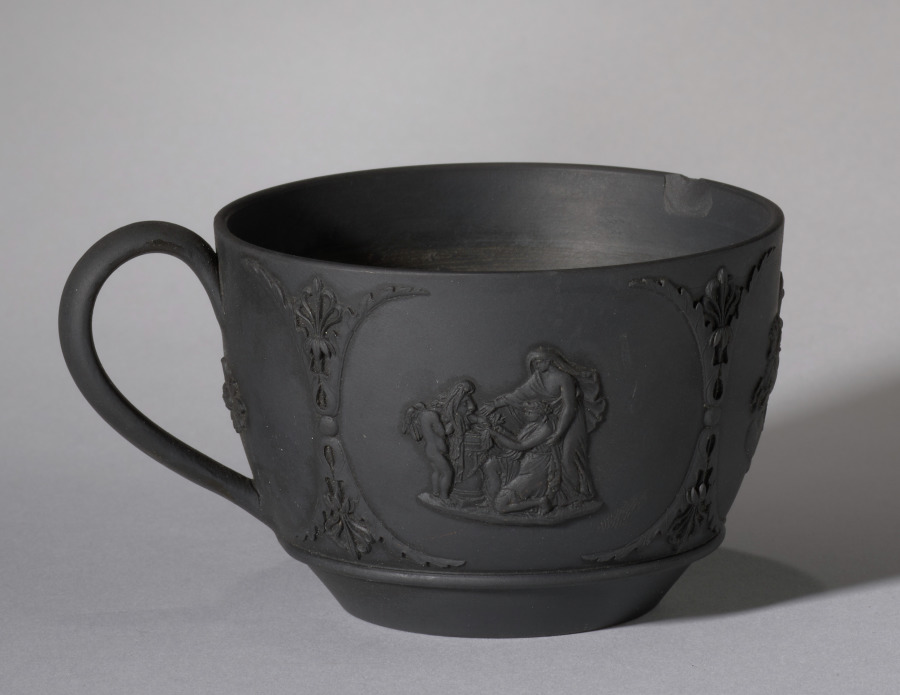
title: Cup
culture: England, Staffordshire, 19th century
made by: Wedgwood Factory (British)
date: 1800s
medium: black basalt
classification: Ceramic